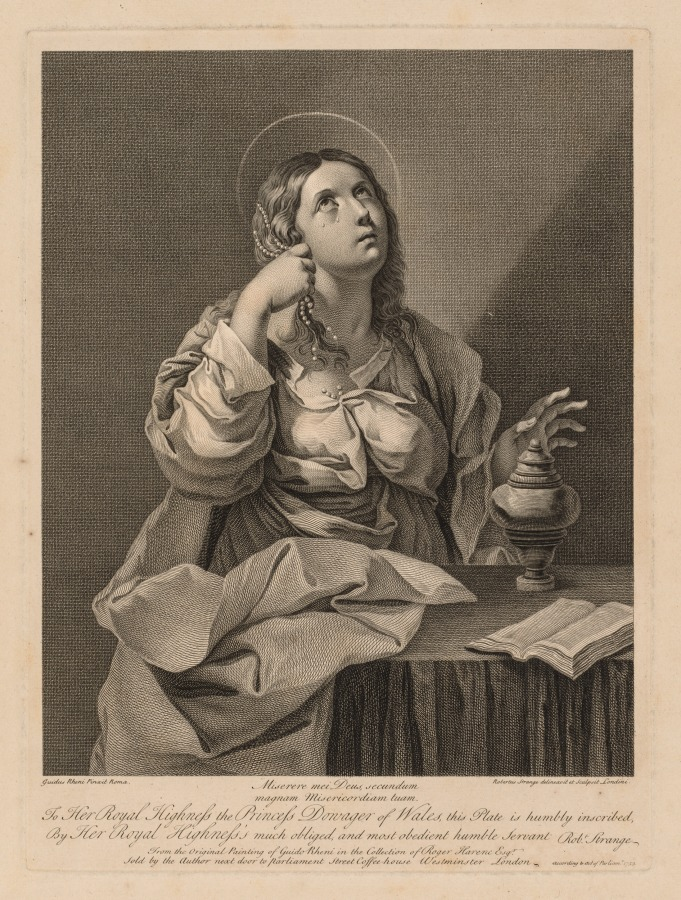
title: Miserere mei Deus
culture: England, 18th century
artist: Robert Strange (British, 1721–1792)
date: 1753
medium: engraving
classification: Print